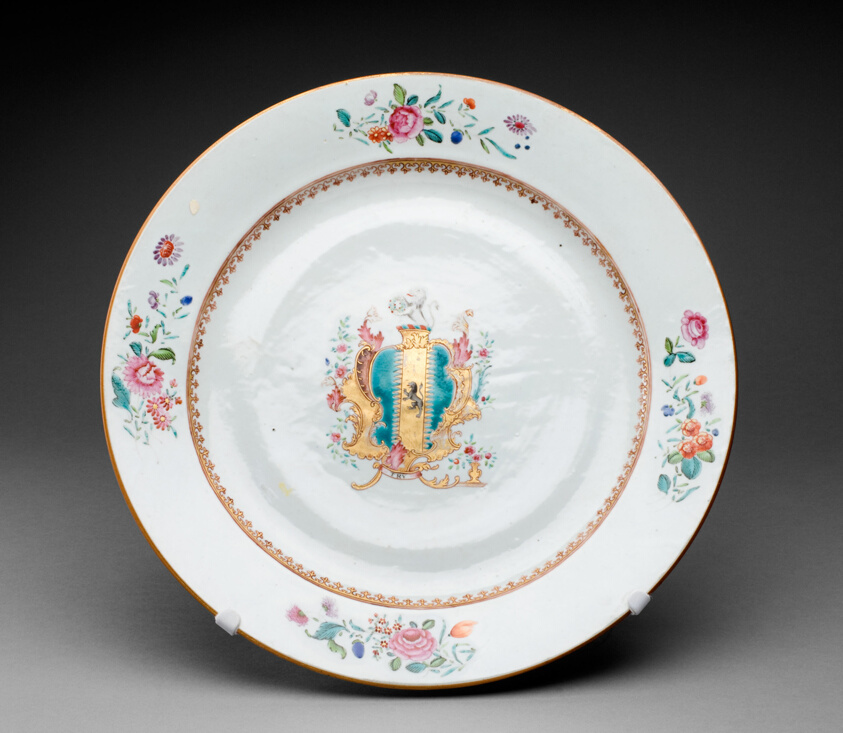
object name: Ceramics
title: Charger with the Arms of O'Hara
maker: China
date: 1763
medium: Hard-paste porcelain with polychrome enamels and gilding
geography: Jingdezhen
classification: ceramics